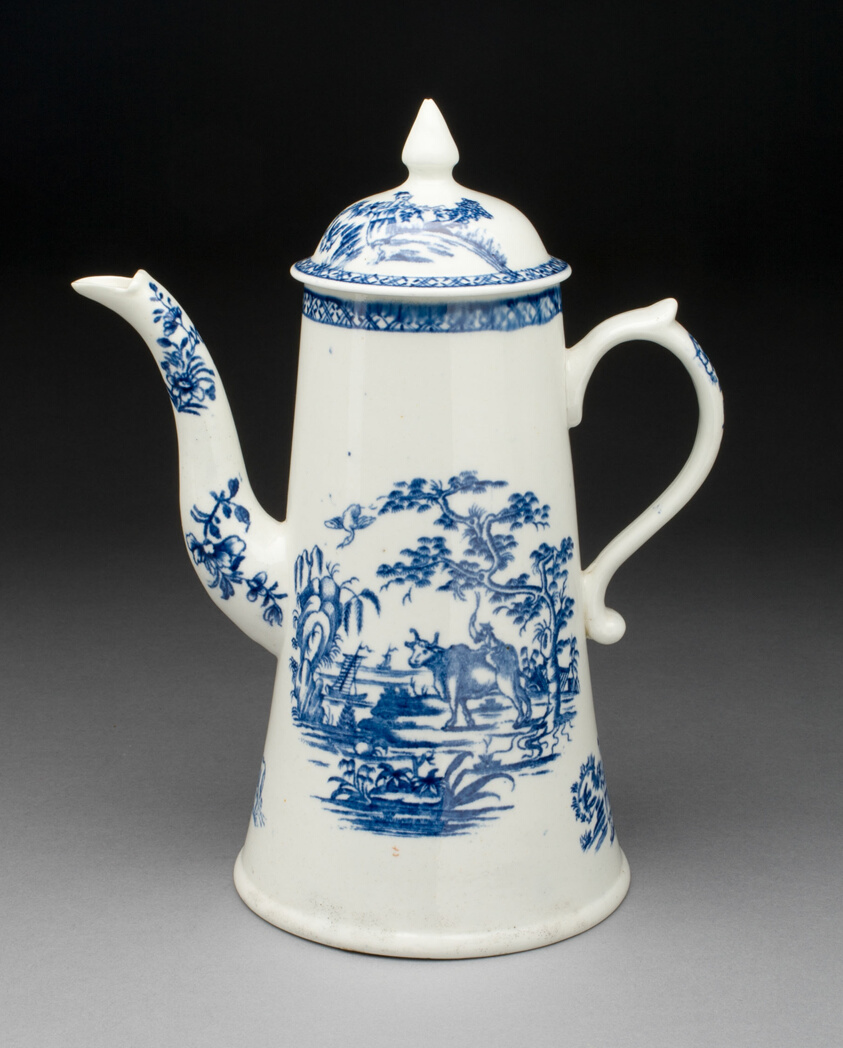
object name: Ceramics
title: Coffee Pot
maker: Derby Porcelain Manufactory (England, 1750-1848)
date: 1765/70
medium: Soft-paste porcelain, underglaze blue and transfer-printed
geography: Derby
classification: porcelain; european decorative arts; ceramics